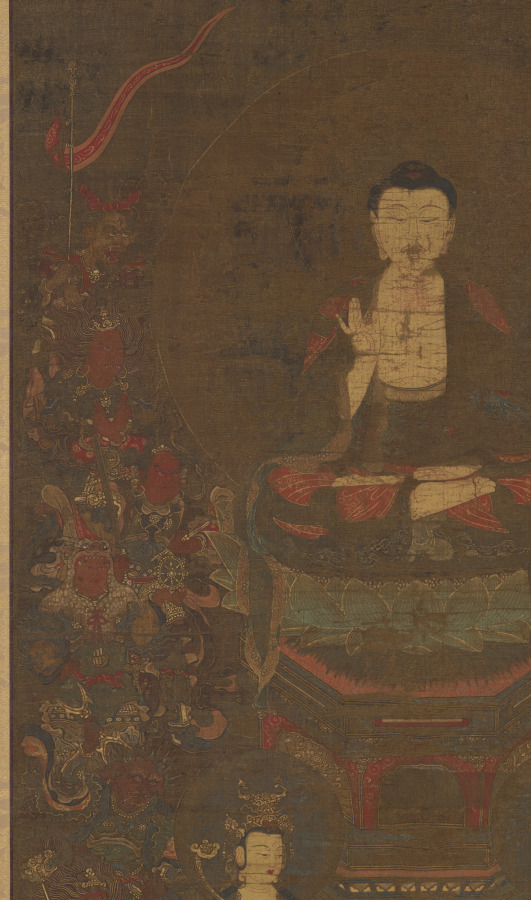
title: Shakyamuni with the Sixteen Benevolent Deities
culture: Japan, Nanbokuchō period (1336–92)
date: mid- to late 1300s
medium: Hanging scroll; ink, color, gold and cut gold on silk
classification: Painting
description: The historical Buddha Shakyamuni forms a triad with the bodhisattvas Fugen and Monju. Sixteen deities who protect the Buddhist scripture called the Great Perfection of Wisdom Sutra surround them. At the bottom left stands the Chinese monk Xuanzang, noted as a Buddhist scholar and translator of religious texts from India, including the Great Wisdom Sutra.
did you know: This painting would have been the main icon for ceremonial readings of the Great Perfection of Wisdom Sutra.